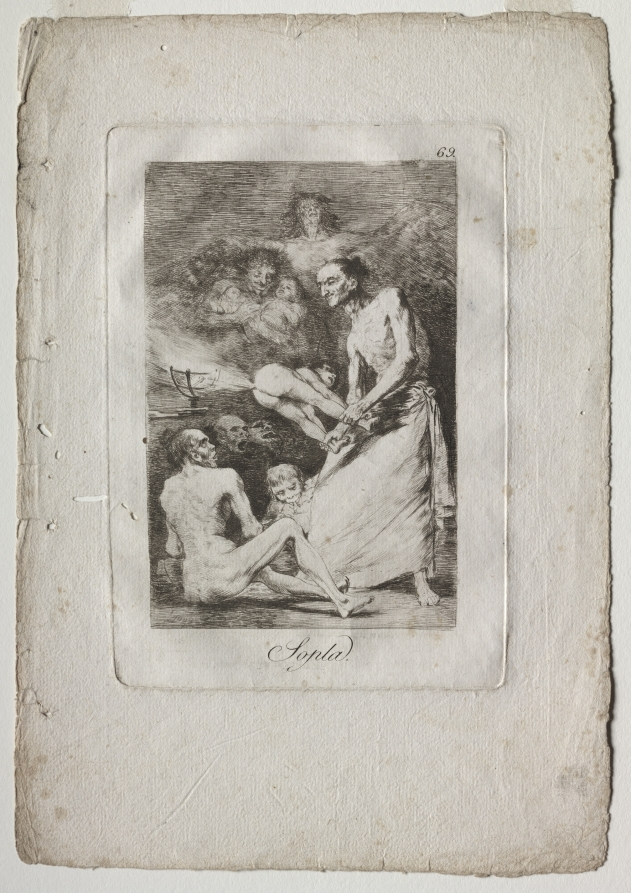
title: Blow, Plate 69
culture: Spain, late 18th-early 19th Century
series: Los Caprichos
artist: Francisco de Goya (Spanish, 1746–1828)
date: 1799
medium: etching, aquatint, drypoint and engraving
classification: Print